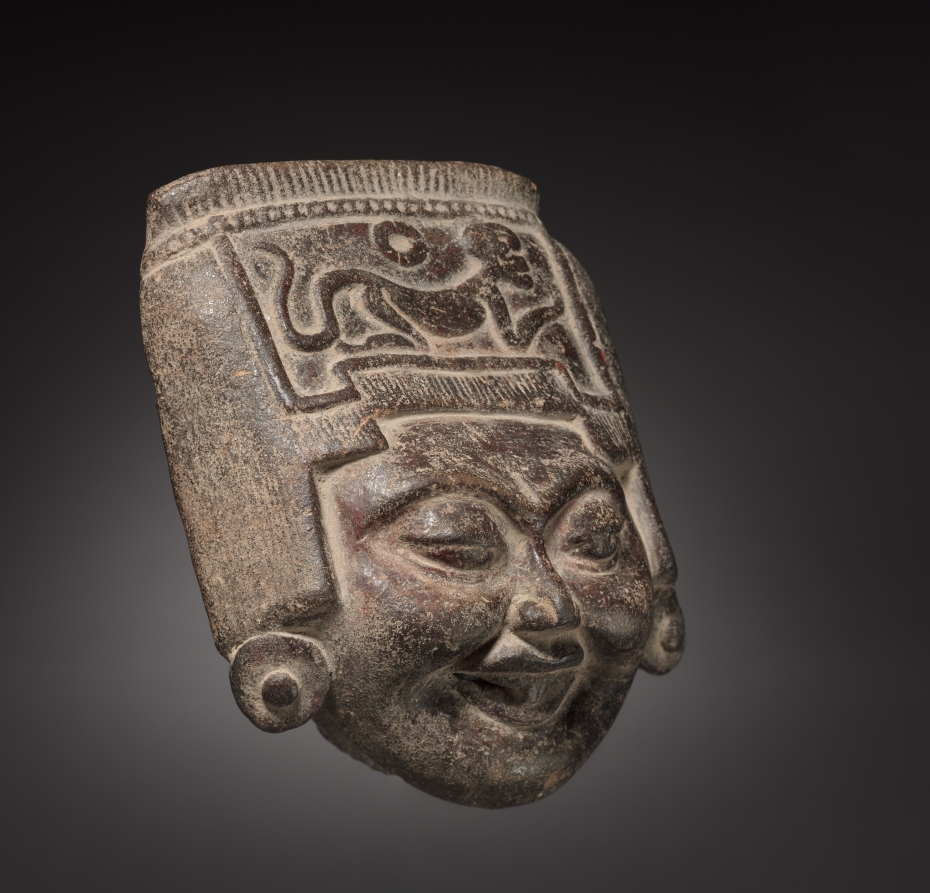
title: Head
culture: Mexico, Classic Veracruz (Remojados Culture)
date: 600–1100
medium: terracotta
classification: Sculpture